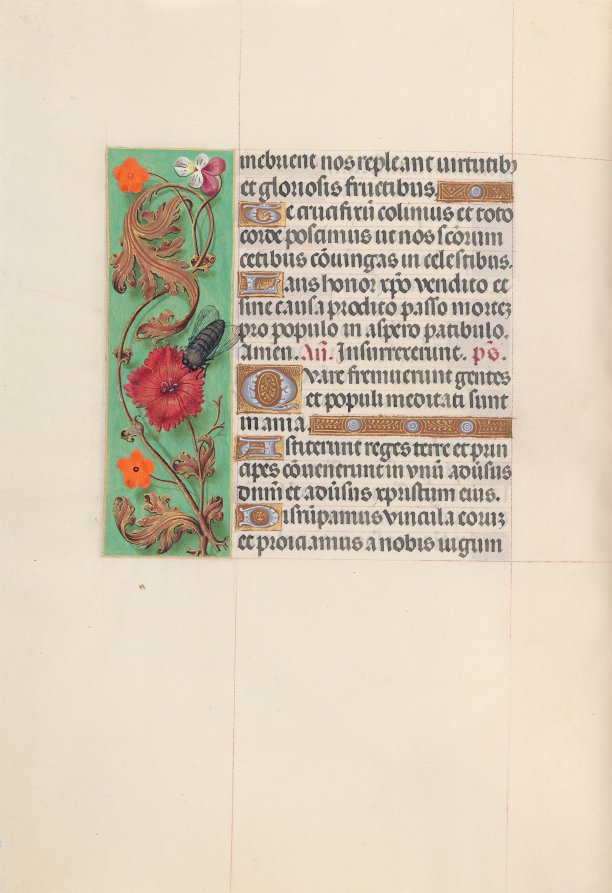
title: Hours of Queen Isabella the Catholic, Queen of Spain: Fol. 52v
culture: Flanders, Ghent and Bruges, late 15th century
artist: Master of the First Prayerbook of Maximillian (Flemish, c. 1444–1519)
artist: and Associates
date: c. 1500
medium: ink, tempera, and gold on vellum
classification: Bound Volume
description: This manuscript was illuminated by a circle of at least five highly organized manuscript painters active in the Flemish cities of Ghent and Bruges. The principal illuminator was Alexander Bening, who painted the majority of the book's miniatures. Manuscripts produced by this circle of artists are renowned for the decoration of their borders, which typically feature a rich variety of realistically-painted flowers, birds, and butterflies. This prayer book, called a book of hours, was intended not for a cleric, but for the private devotions of a lay person-in this case, Isabella the Catholic, Queen of Spain (1451-1504). Isabella's coat of arms embellishes the book's frontispiece. It is unlikely that the book was commissioned by the Queen herself; rather, she probably received it as a diplomatic gift from someone courting her patronage, perhaps Cardinal Francisco Jimenez de Cisneros. A Franciscan friar, Jimenez was dependent upon Isabella for his advancement, first to the post of Queen's confessor in 1492, and then to Archbishop of Toledo in 1495.